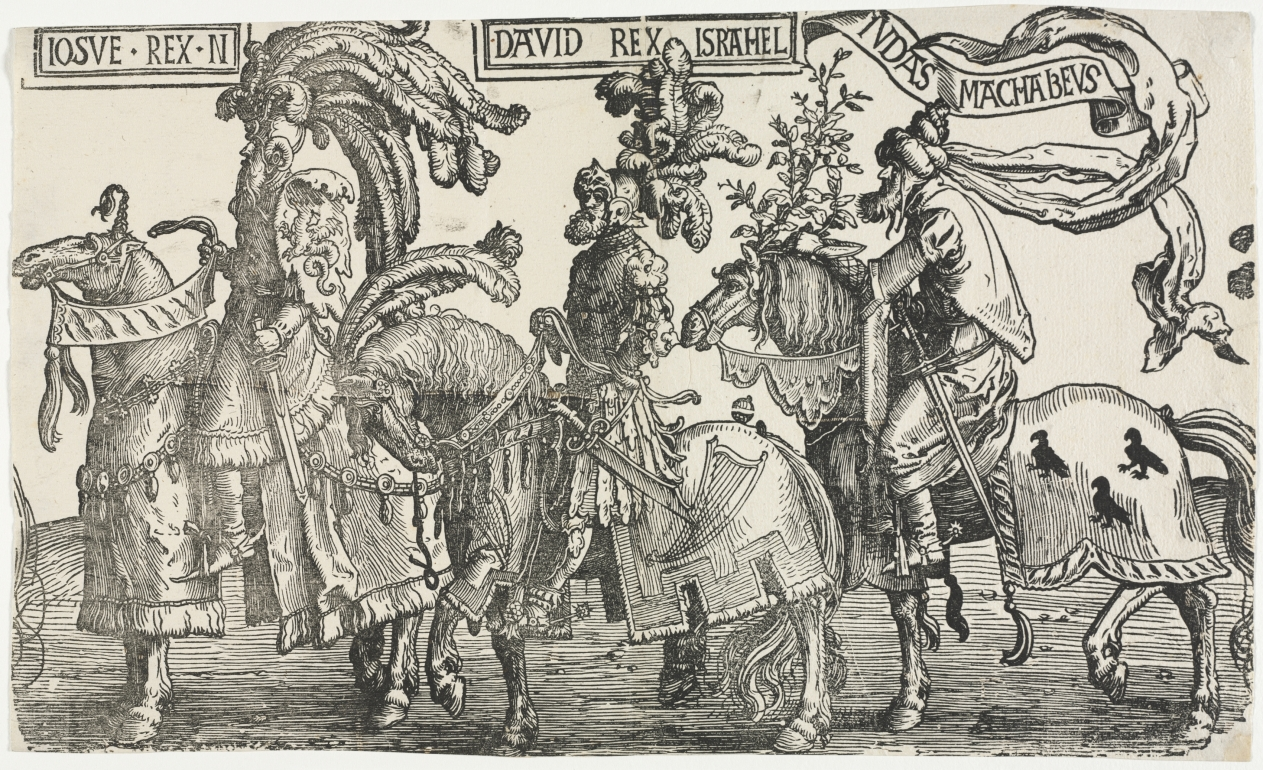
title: The Nine Heroes: Joshua, David, Judas Maccabees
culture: Netherlands, 16th century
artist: Lucas van Leyden (Netherlandish, 1494–about 1533)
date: 1515–1517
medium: woodcut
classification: Print